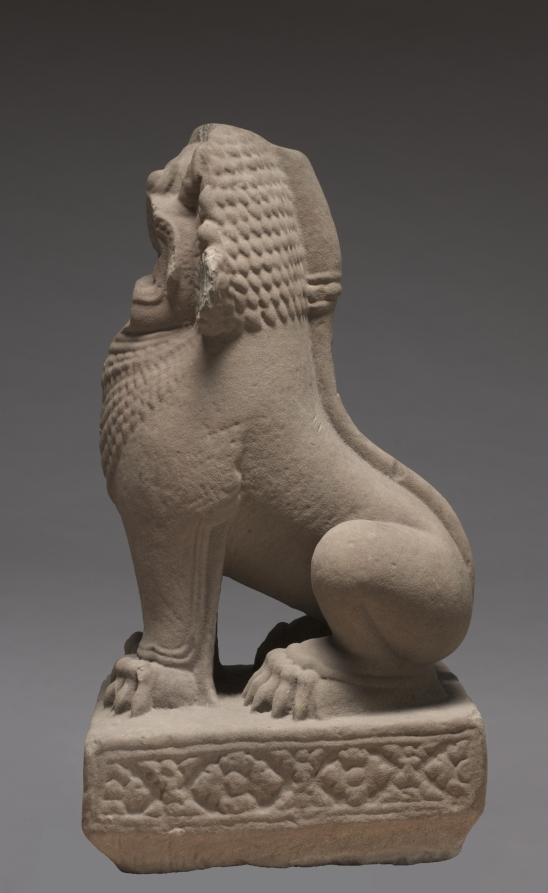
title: Lion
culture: Cambodia, Khmer, Angkorean period (877-1431)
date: 1100s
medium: stone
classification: Sculpture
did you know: Lions were not native to Cambodia.